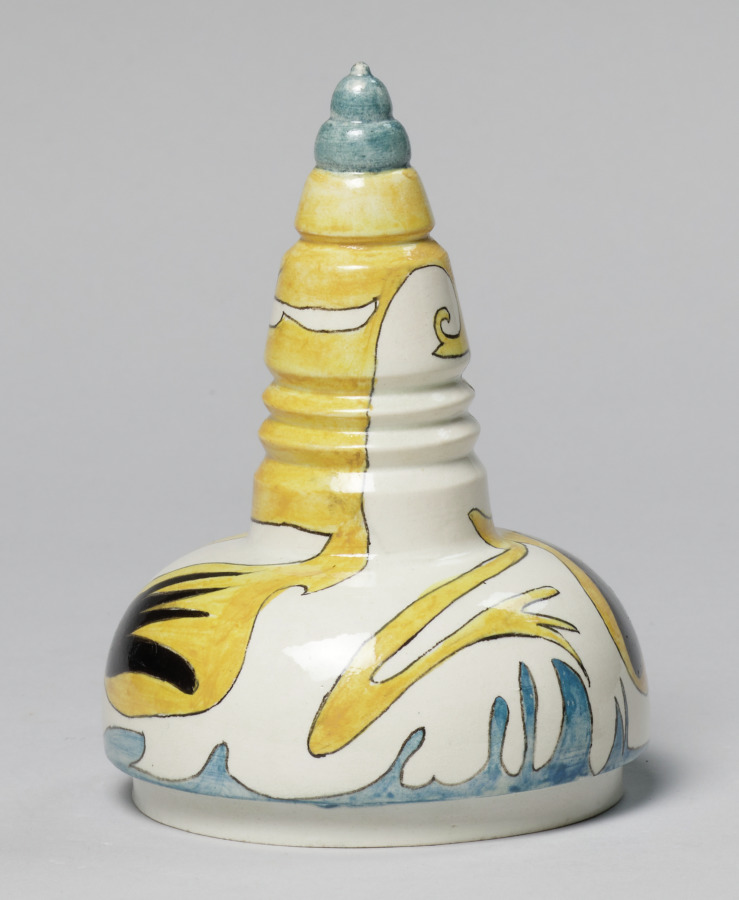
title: Lid for a Jar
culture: Netherlands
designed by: Theodorus A. C. Colenbrander (Dutch, 1841–1930)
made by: Rozenburg Factory (Netherlandish)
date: 1885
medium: earthenware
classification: Ceramic